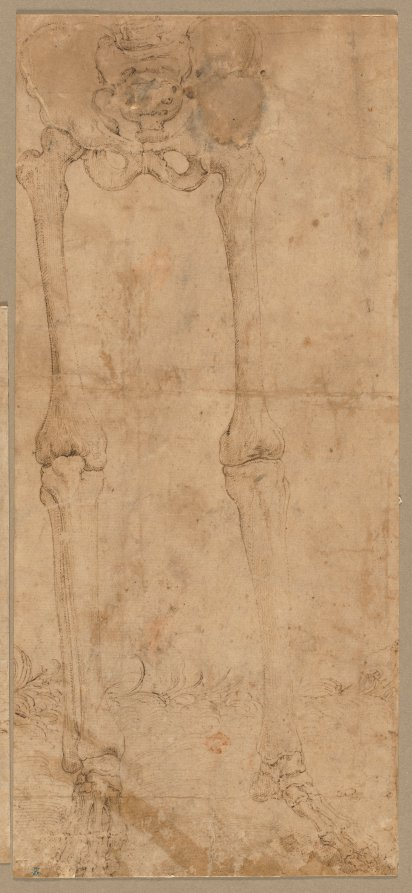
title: Lower Half of Skeleton from the Front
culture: Italy, 16th century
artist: Battista Franco (Italian, c. 1510–1561)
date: early 1540s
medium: pen and brown ink with incised lines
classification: Drawing